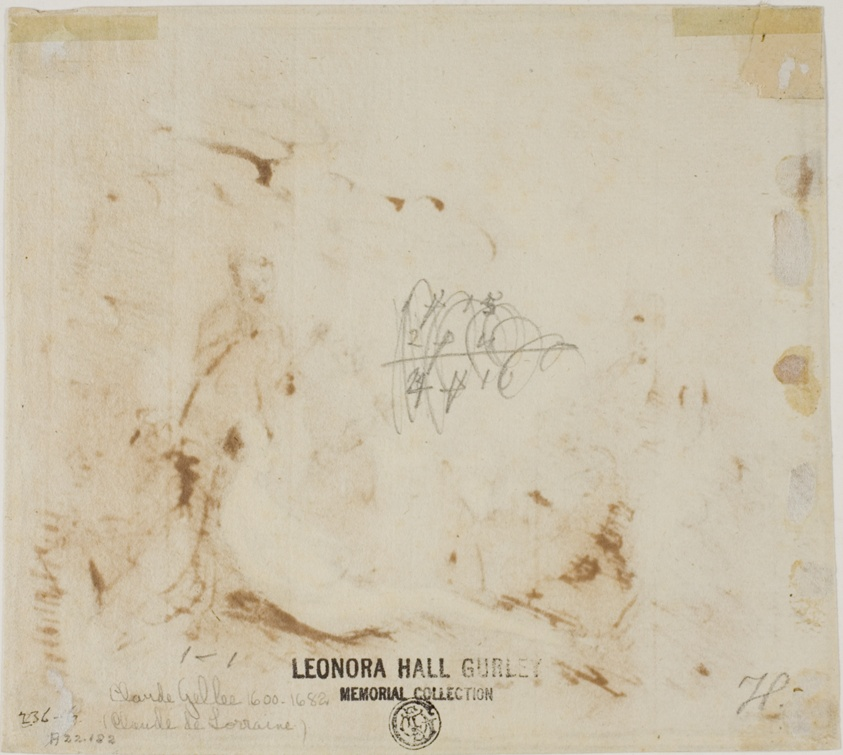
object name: Drawing and Watercolor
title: Nymphs and Satyrs Playing Musical Instruments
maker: Claude Lorrain (French, 1600-1682)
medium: Pen and brown ink, with brush and brown wash, on cream laid paper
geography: France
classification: pen and ink drawings; paper; drawings (visual works); prints and drawing